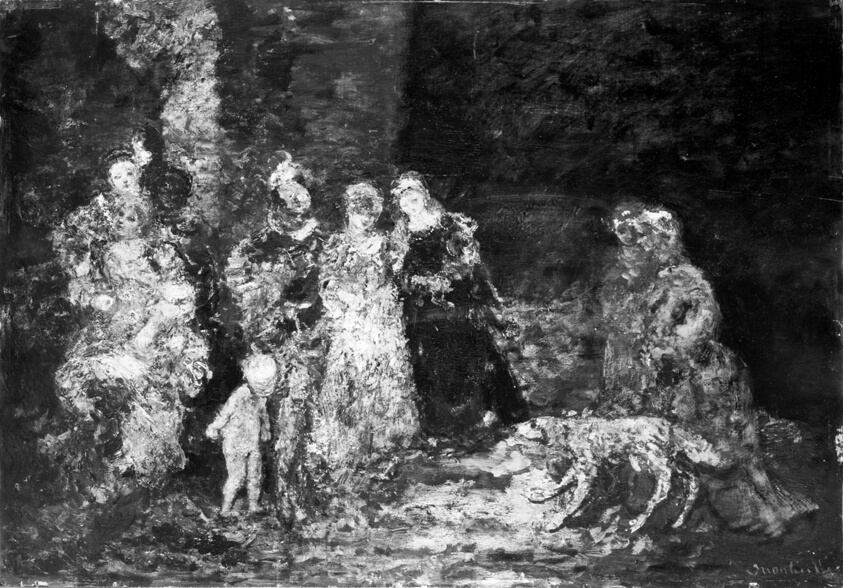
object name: Painting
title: The Fairies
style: nineteenth century, 19th century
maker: Adolphe Monticelli (French, 1824–1886)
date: 1870/80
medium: Oil on panel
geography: France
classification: painting; paint; oil paintings (visual works); oil on panel; french; european painting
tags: women, dog, animals, children, woman, woman with children